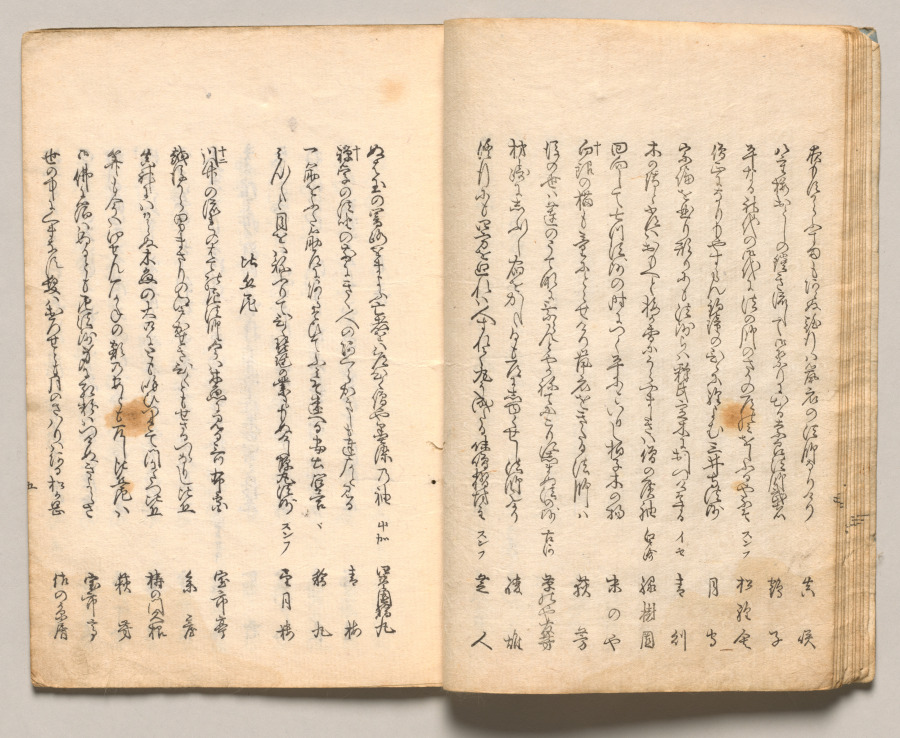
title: Spread Twelve from Volume Two of People of Japan in Light Verse (Kyōka)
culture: Japan, Edo period (1615–1868)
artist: Utagawa Hiroshige (Japanese, 1797–1858)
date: 1857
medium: Woodblock-printed book; ink and color on paper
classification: Bound Volume